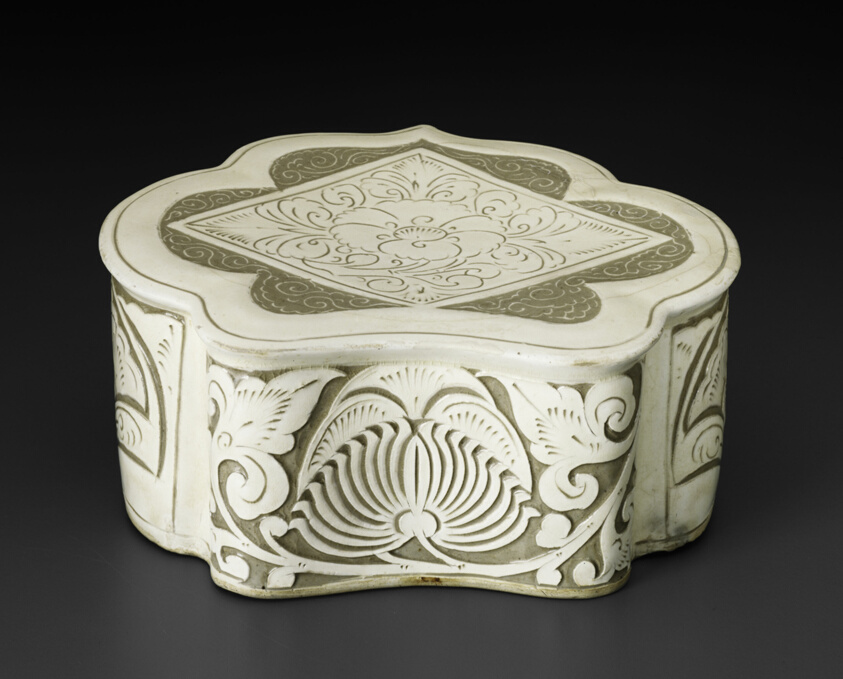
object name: Decorative Arts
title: Cloud-Shaped Pillow with Peony Scroll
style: Chinese (culture or style)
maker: China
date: Northern Song dynasty (960–1127), late 10th/early 11th century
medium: Cizhou ware; stoneware, slip-coated with underglaze carved, incised, and inlaid decoration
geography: China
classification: stoneware; asian art; ceramics; decorative arts